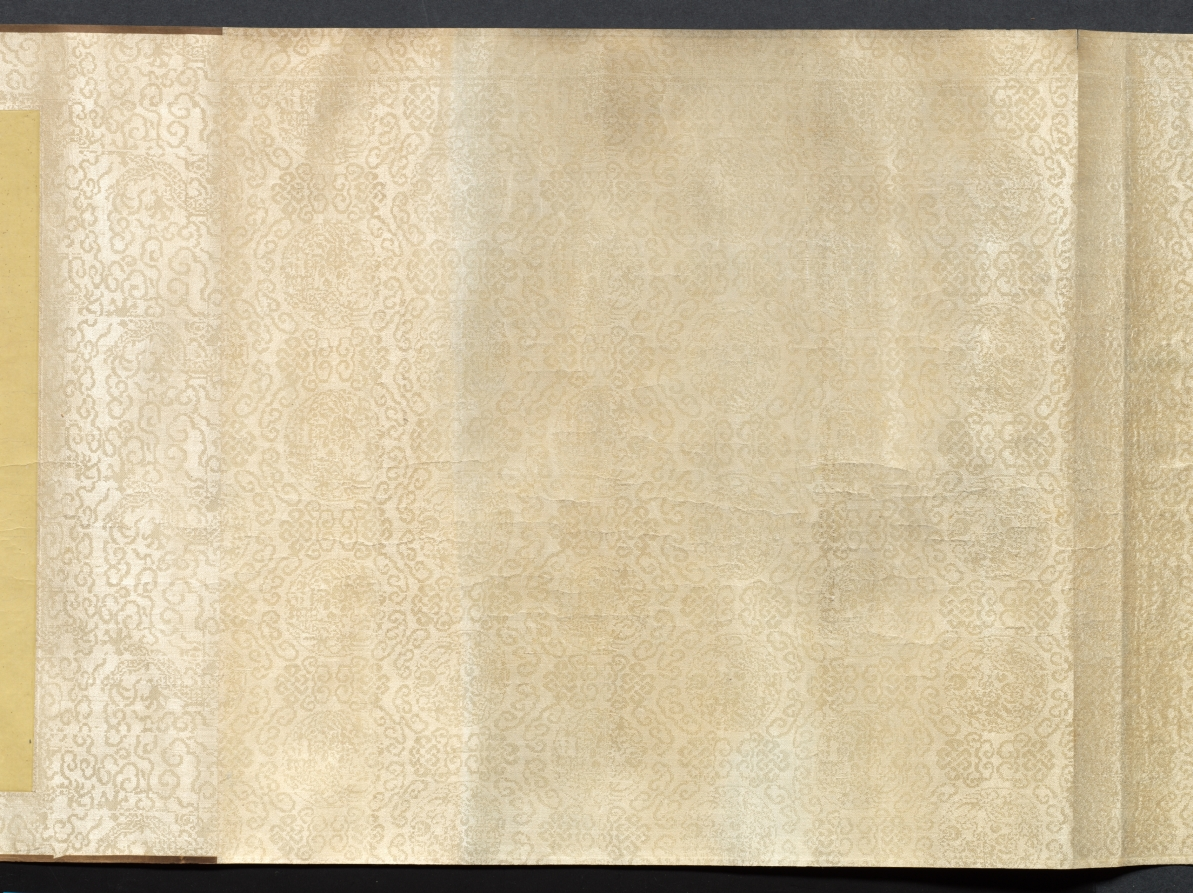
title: Palace Ladies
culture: China, Qing dynasty (1644-1911)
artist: copy after Qiu Ying (Chinese, 1494–1552)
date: 1644–1911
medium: handscroll, ink and color on silk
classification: Painting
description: This handscroll illustrates the pursuits of court ladies in a palace precinct on a spring day. Women, young girls, and their maids amuse themselves by sitting on a swing, playing games, watering and admiring peonies, performing music together, playing the qin (zither), feeding a parrot on the balustrade and fish in the water, or catching butterflies. The life of elite women was mostly restricted to the so-called inner quarters, meaning the garden and inner courts of the house. This painting idealizes the world of young palace girls that in fact was often filled with boredom and waiting for a lover.